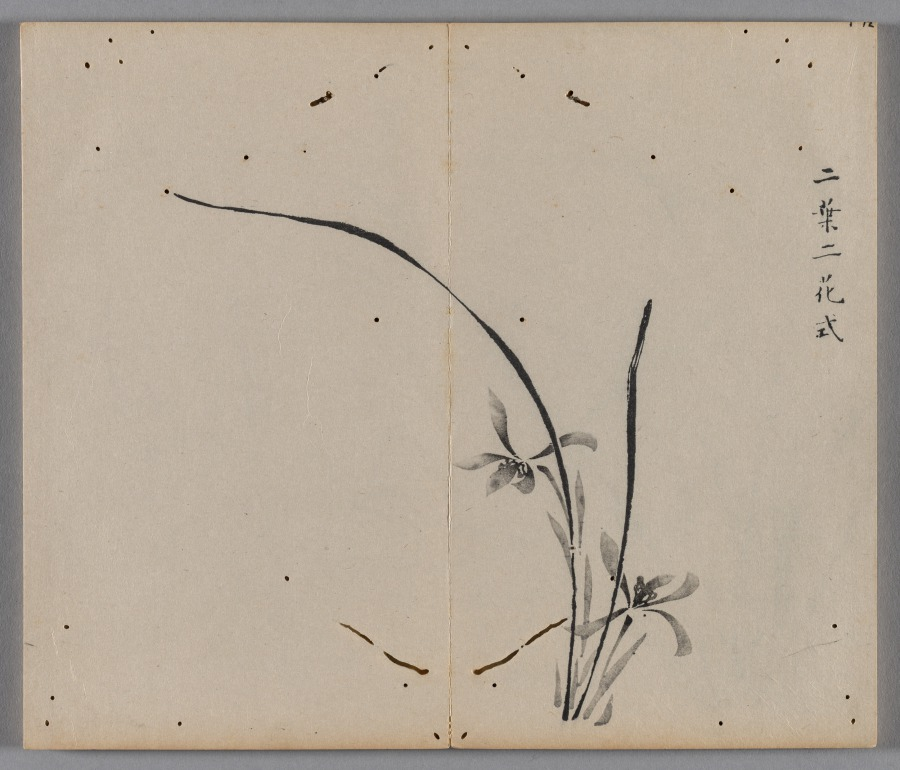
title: Ten Bamboo Studio Painting and Calligraphy Handbook (Shizhuzhai shuhua pu): Orchids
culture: China, Qing dynasty (1644-1911)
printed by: Hu Zhengyan (Chinese, c. 1584–1674)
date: 1633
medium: Woodblock-printed book; ink and colors on paper; first edition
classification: Print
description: Color printing reached a level of perfection in the early 1600s, as seen in this Ten Bamboo Studio Collection of Calligraphy and Painting and the Mustard Seed Garden Manual of Painting (printed 1679 and 1701). The painterly quality, precision in registering (aligning) the woodblocks, and harmonious colors made them the most successful color print editions in Chinese history. Both editions were printed and compiled in Nanjing, spread nationwide, and had a great impact on the arts in Japan and Korea.